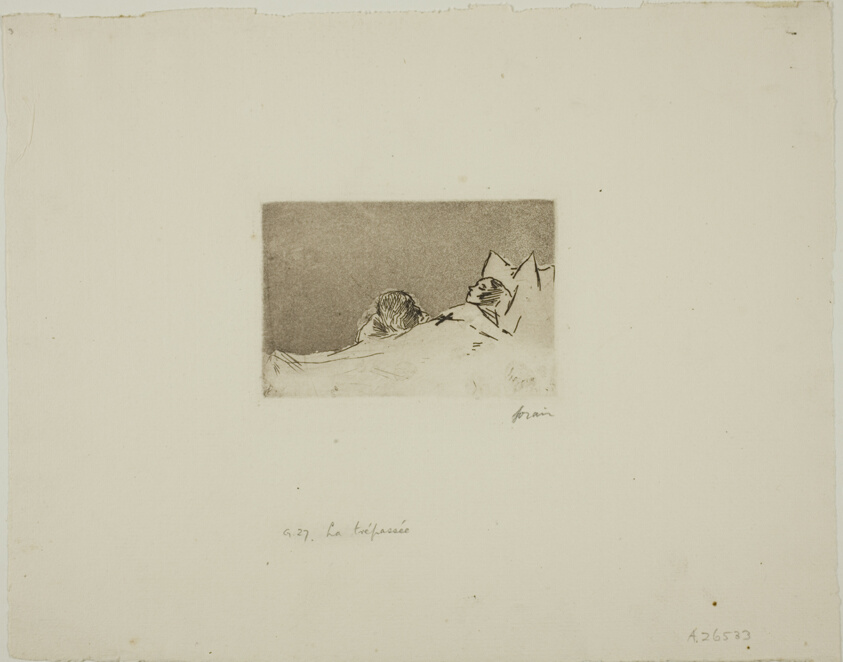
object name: Print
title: The Dead Girl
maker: Jean Louis Forain (French, 1852-1931)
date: 1884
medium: Etching and aquatint on cream laid paper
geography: France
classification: etching; print; prints and drawing